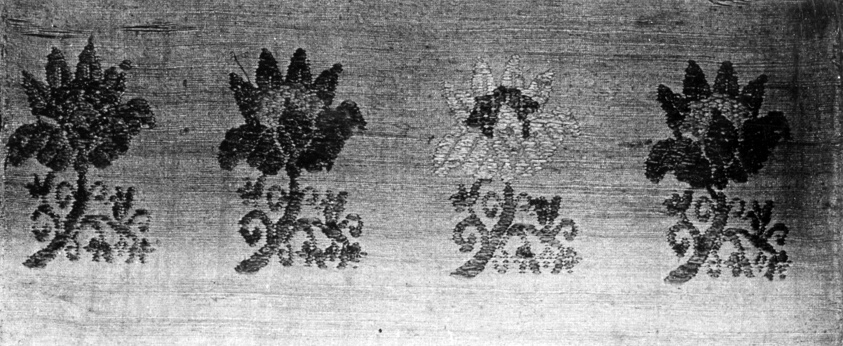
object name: Textile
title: Fragment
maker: Germany or Netherlands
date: 17th century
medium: brocaded linen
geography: Germany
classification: textile; weaving